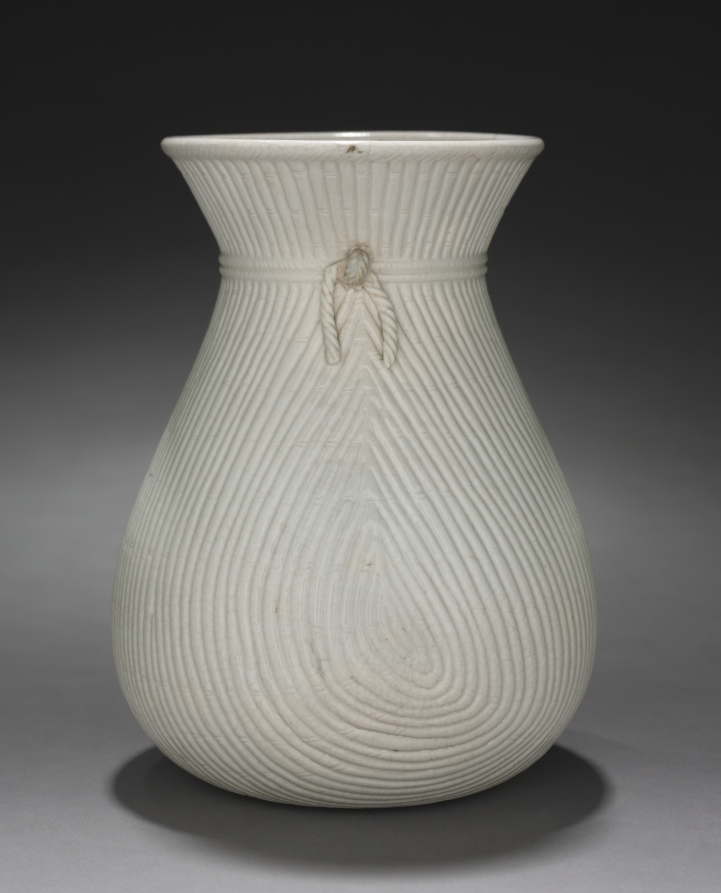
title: Basket Shaped Vase: Ding Ware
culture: China, Ming dynasty (1368–1644)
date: 1600s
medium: glazed porcelain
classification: Ceramic